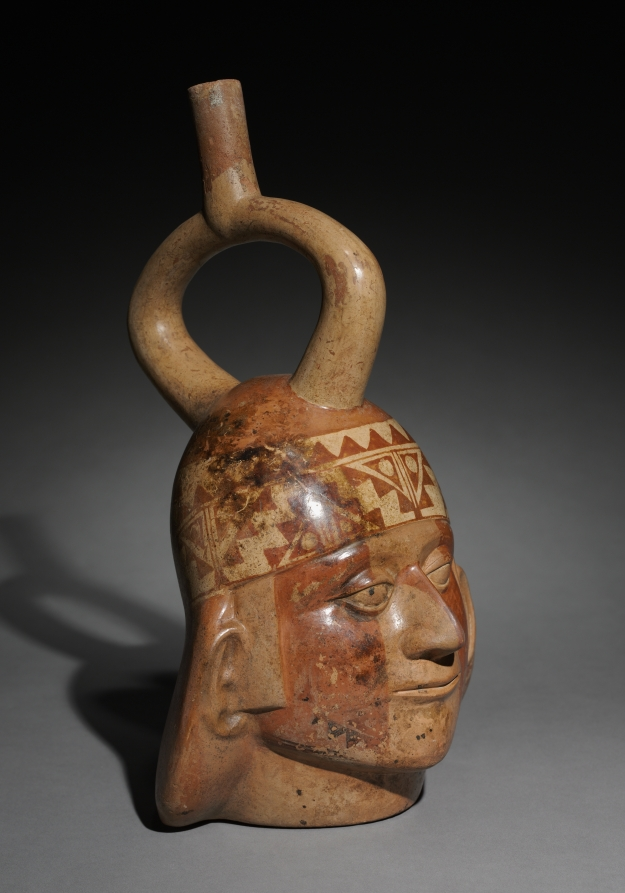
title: Portrait Head Vessel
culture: Peru, North Coast, Moche style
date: c. 200–550 CE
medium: earthenware with colored slips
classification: Sculpture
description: The Moche were unique in ancient Peru in creating realistic human portraits, usually in the form of ceramic vessels. In general, such vessels represent more than 750 individuals; identities are unclear but most are elite men, some probably rulers. The stirrup-shaped spout is a hallmark of Moche ceramic production.